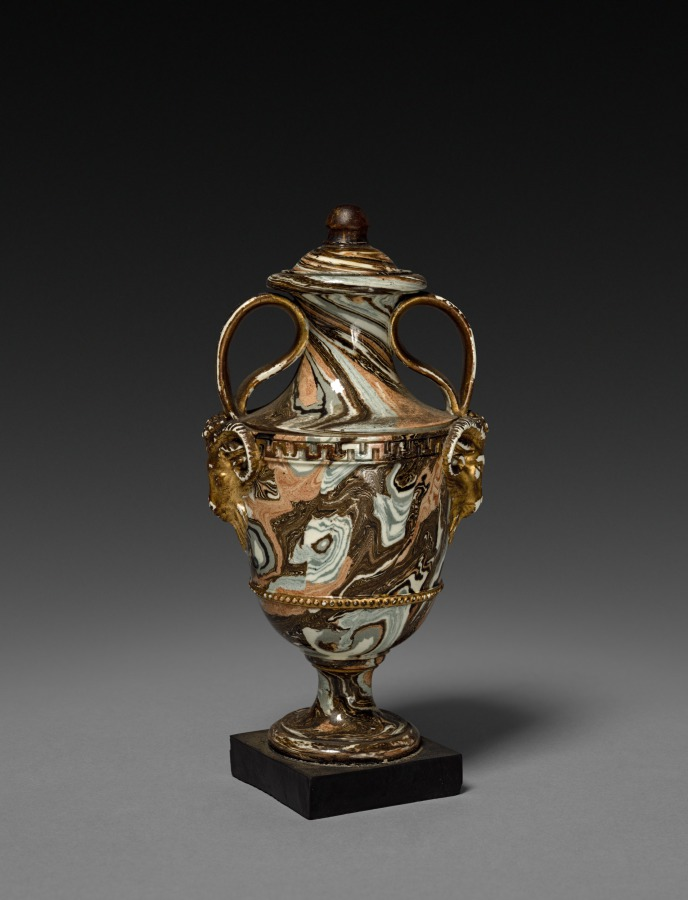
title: Urn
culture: England, late 18th or 19th century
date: late 1700s - 1800s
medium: earthenware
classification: Ceramic